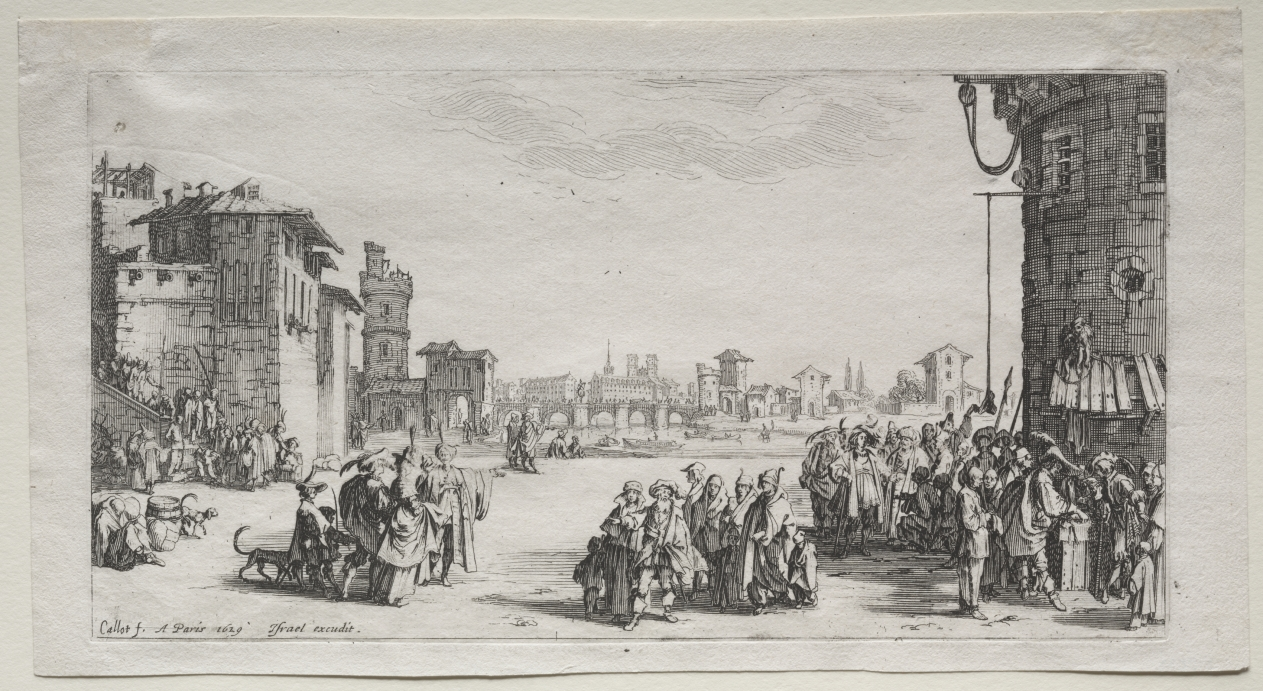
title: The Slave Market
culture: France, 17th century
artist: Jacques Callot (French, 1592–1635)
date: 1629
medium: etching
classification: Print